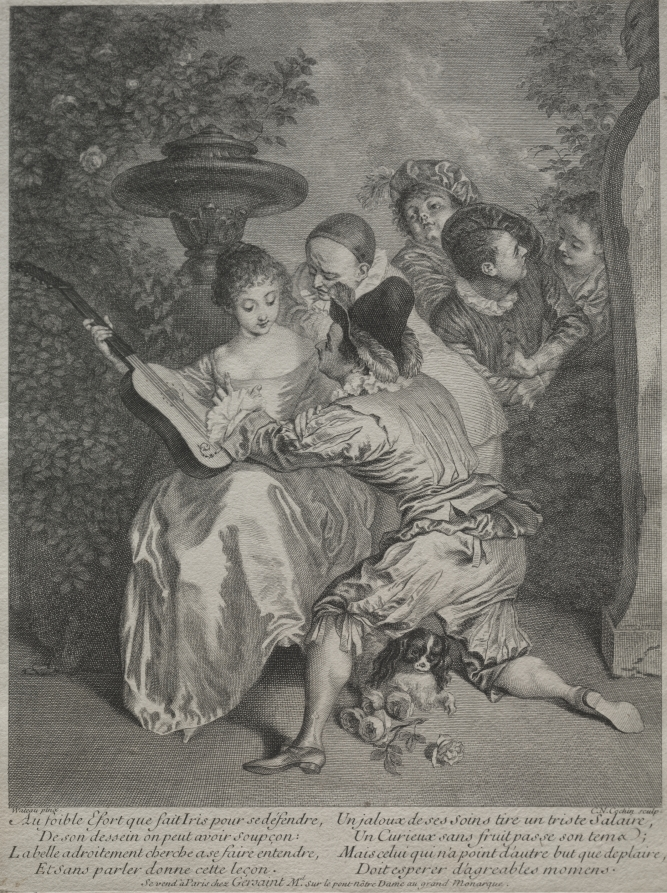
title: The Romancer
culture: France, 18th century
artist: Charles-Nicolas Cochin (French, 1715–1790)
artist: after Jean-Antoine Watteau (French, 1684–1721)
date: 1727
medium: engraving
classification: Print